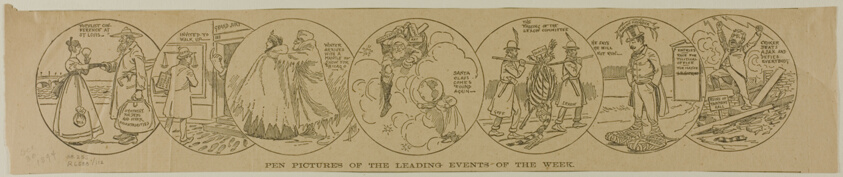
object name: Print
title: Pen Pictures of The Leading Events of the Week, from Chicago Tribune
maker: H. R. H. (American, 19th century)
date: published December 30, 1894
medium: Lithograph on newsprint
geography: United States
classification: lithograph; print; prints and drawing